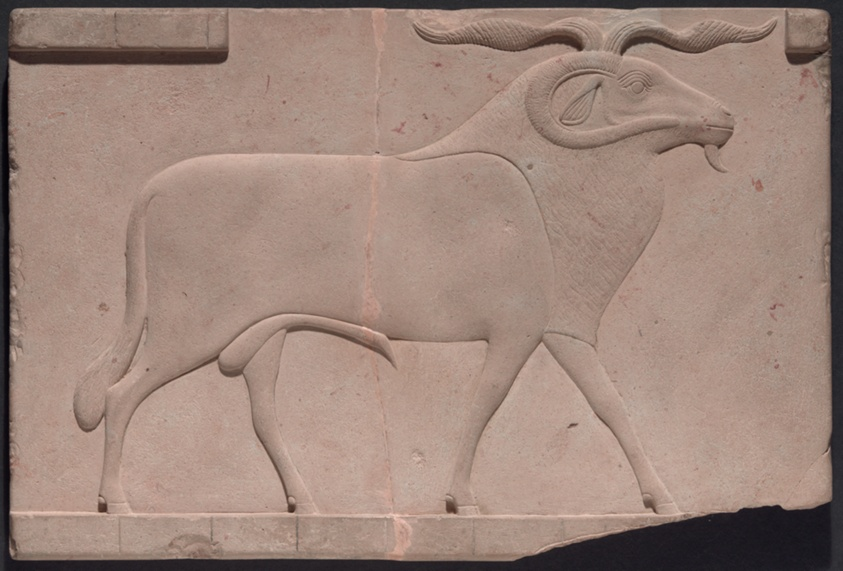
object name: Architectural fragment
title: Plaque Depicting a Ram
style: ptolemaic, greco-roman (egyptian), ancient, egyptian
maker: Egyptian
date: Ptolemaic Period (332–30 BCE)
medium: Limestone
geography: Egypt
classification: plaque (flat object); stone; sculpture; ancient art; votive offering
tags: ram, animals